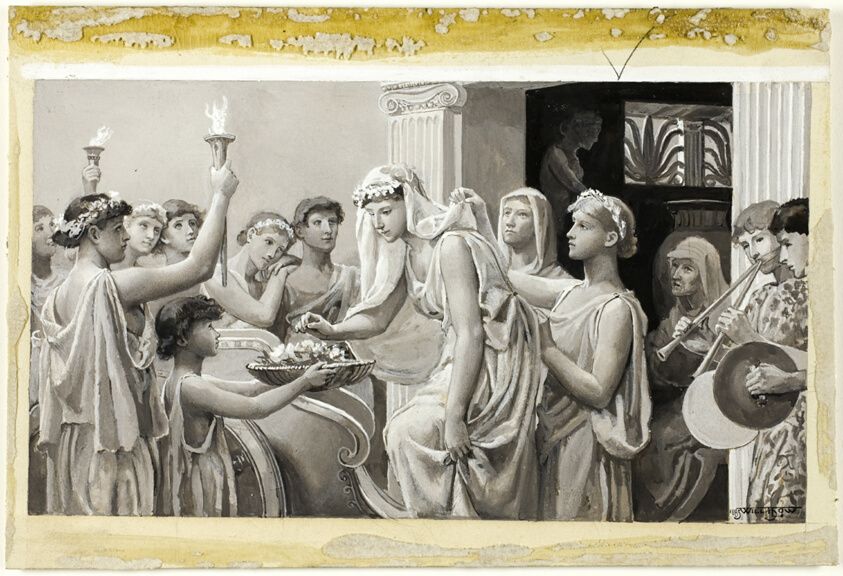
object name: Drawing and Watercolor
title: It Was the Custom Then to Bring Away the Bride From Home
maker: Will Hicock Low (American, 1853-1932)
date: 1885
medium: Black, gray and white gouache on cream wood-pulp laminate board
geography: United States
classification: drawings (visual works); prints and drawing